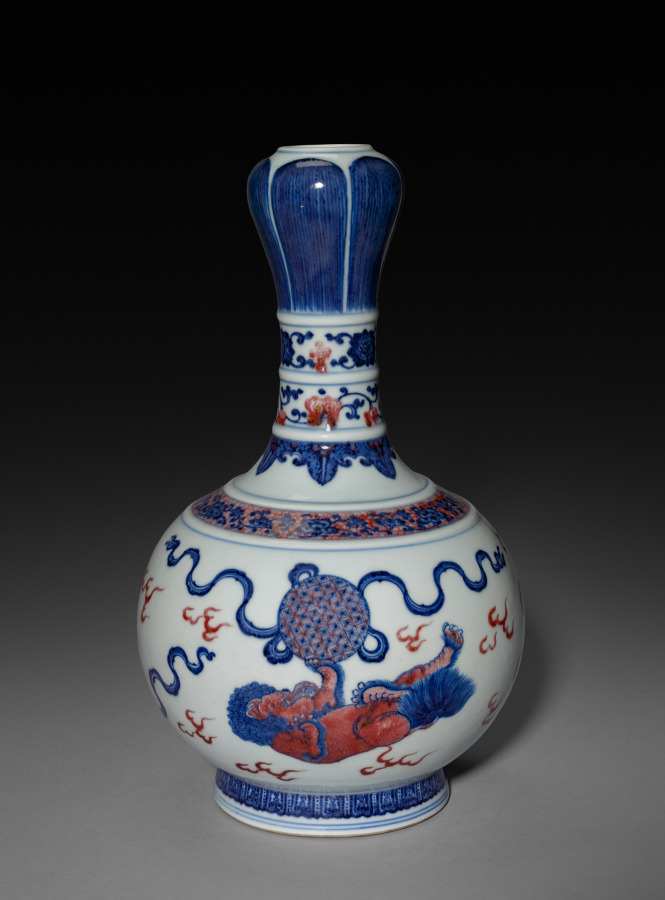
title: Bottle-shaped Vase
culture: China, Qing dynasty (1644–1911), Qianlong reign (1736–95)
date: 1736–95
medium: porcelain with underglaze decoration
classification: Ceramic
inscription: 大清乾隆年制